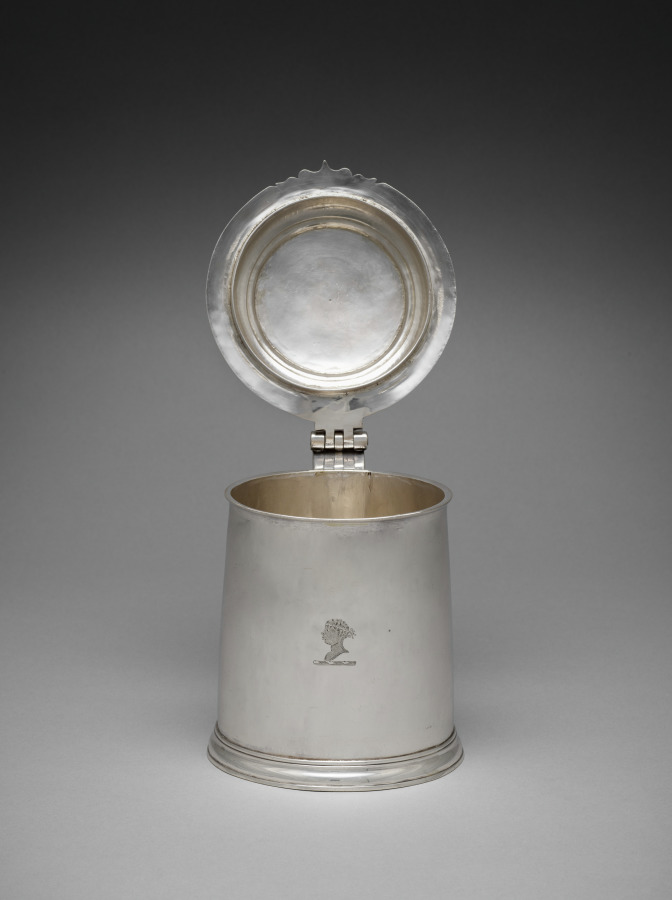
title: Tankard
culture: England, London, 18th century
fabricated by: Anthony Nelme (British)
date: 1703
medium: silver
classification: Silver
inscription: engraved beneath base: "H/RM." Engraved opposite handle crest with head of a blackamore; identified in Fairbairn as DEN family crest.